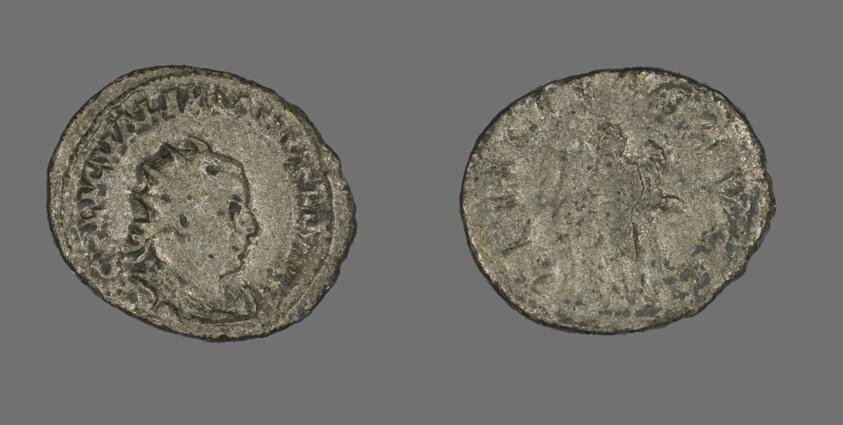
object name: Coin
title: Antoninianus (Coin) Portraying Emperor Valerian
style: roman (ancient, style or period)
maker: Roman, minted in Rome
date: 255-257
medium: Billon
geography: Roman Empire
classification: coin; ancient art